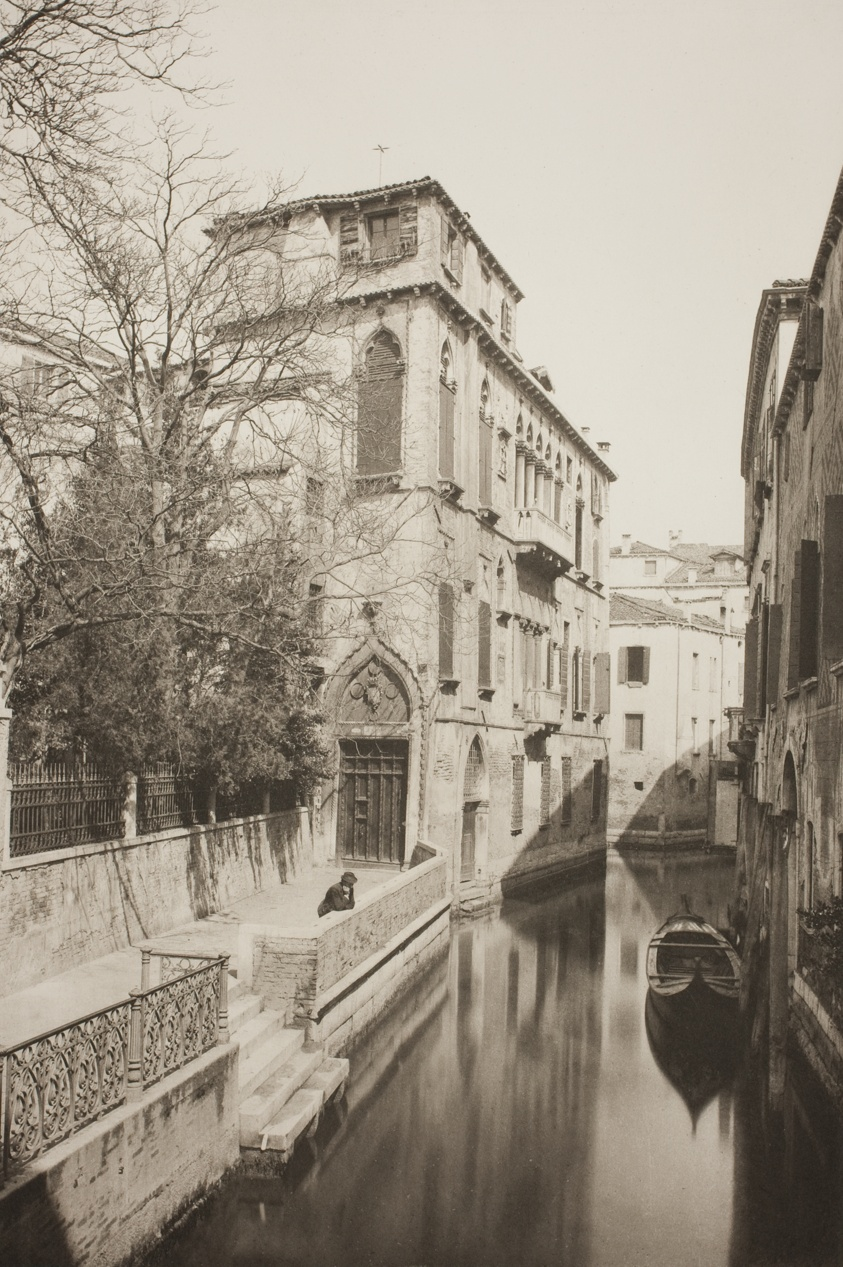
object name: Photograph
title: Untitled (1)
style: 19th century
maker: edited by Ferdinando Ongania; Italian, 1842–1911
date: c. 1890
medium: Photogravure, No. 1 from the portfolio "Calli, Canali e Isole della Laguna"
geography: Italy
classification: photograph; photography